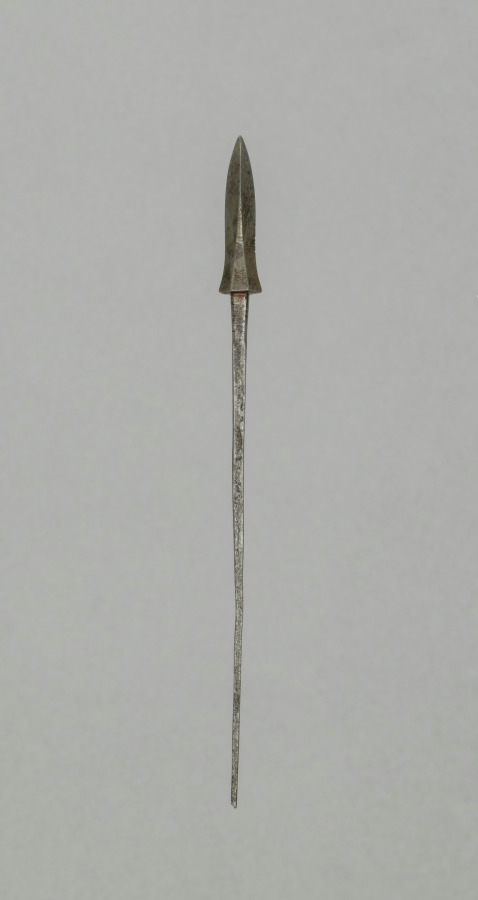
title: Arrow Point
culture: Japan, Edo period (1615–1868)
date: 1700s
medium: steel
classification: Arms and Armor